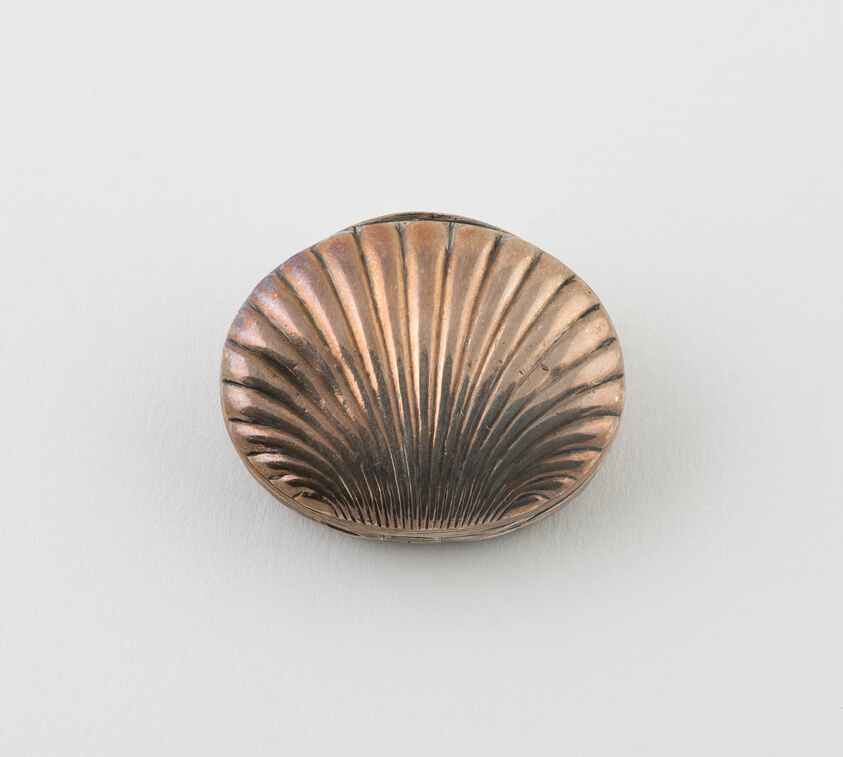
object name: Metalwork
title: Vinaigrette in the Form of a Scallop Shell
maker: Possibly Joseph Willmore; Birmingham, England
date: 1816/17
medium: Silver and silver gilt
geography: Birmingham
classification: container for personal use; vinaigrette (container for health care); european decorative arts; metalwork; silver; decorative object/ornament